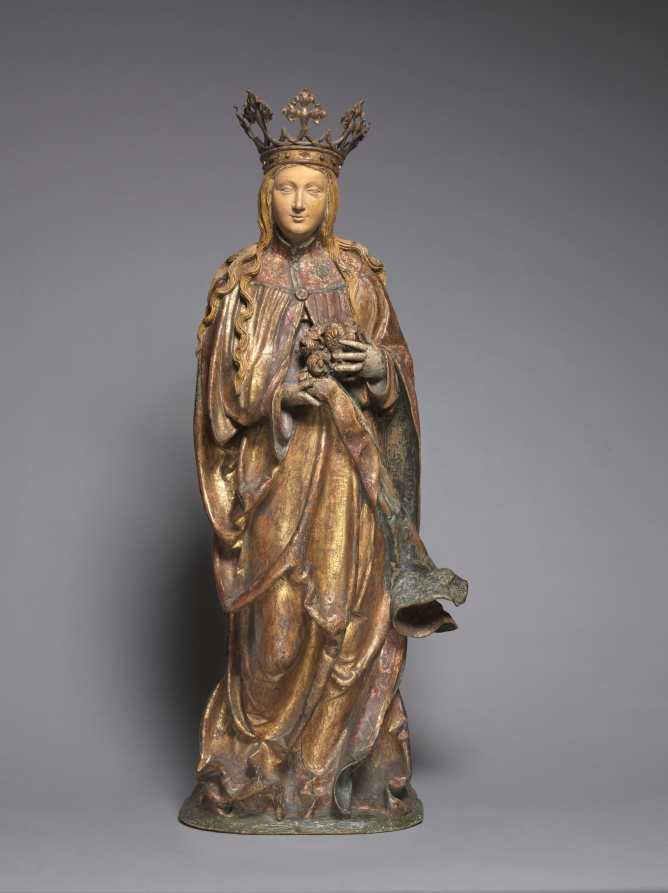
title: Saint Elizabeth of Hungary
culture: Germany, Bavaria, 16th century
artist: Mätthaus Kreniss (German)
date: c. 1515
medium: lindenwood with polychromy and gilding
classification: Sculpture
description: Saint Elizabeth was born in 1207, the daughter of Andreas II, King of Hungary; her crown alludes to her royal birth. Many legends about her generosity and work on behalf of the poor were circulated in the Middle Ages, among them the subject of this sculpture: food she was carrying to the poor was miraculously changed to roses to avoid discovery by her husband. Much of the original paint and gilding is preserved on this sculpture except the face, which had been stripped and repainted in heavy oils prior to its acquisition by the museum. This modern paint has been removed.